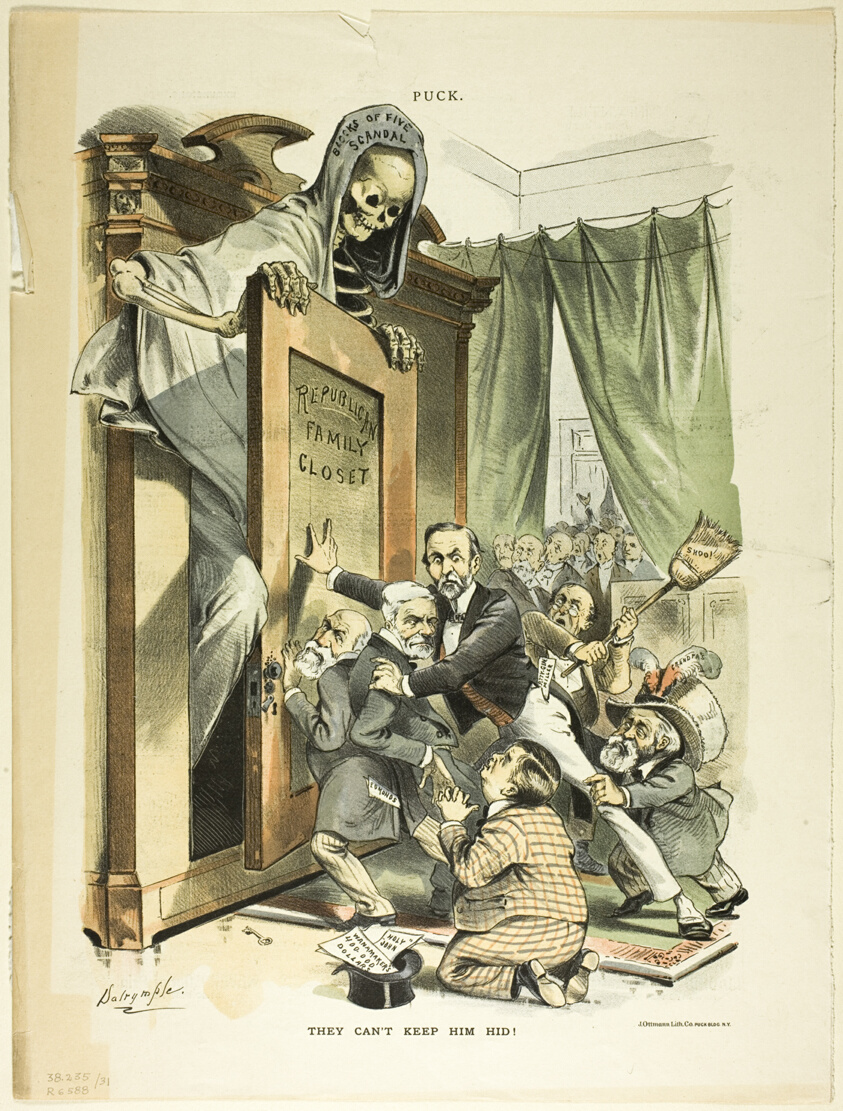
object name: Print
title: They Can't Keep Him Hid, from Puck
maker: Louis Dalrymple (American, 1865-1906)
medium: Color lithograph on newsprint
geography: United States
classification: lithograph; print; prints and drawing